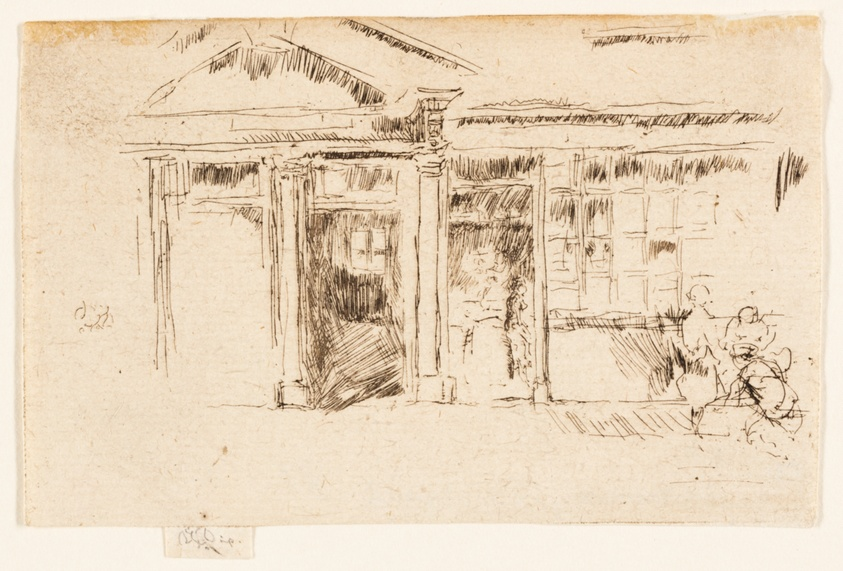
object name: Print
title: Double Doorway, Sandwich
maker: James McNeill Whistler (American, 1834-1903)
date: 1887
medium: Etching and drypoint with foul biting in black ink on ivory laid paper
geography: United States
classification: etching; foul biting; print; prints and drawing; paper; drypoint